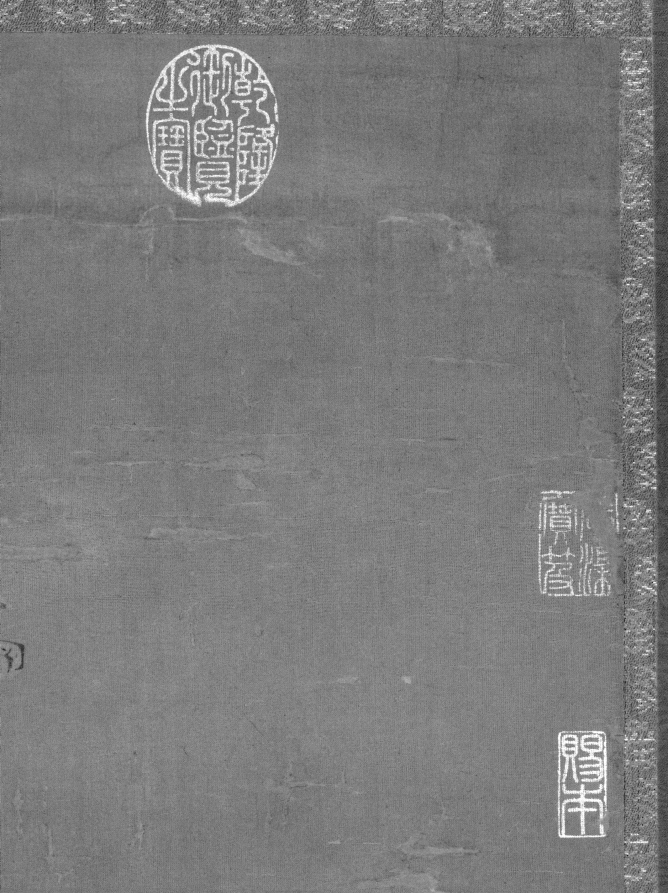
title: A Prunus in the Moonlight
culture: China, Yuan dynasty (1271-1368)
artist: Wang Mian (Chinese, 1287–1359)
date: 1300s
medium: Hanging scroll; ink on silk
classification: Painting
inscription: 8 additional seals: 6 of the Qianlong 乾隆 emperor (r. 1736-95); 2 of Dong Gao 董誥 (1740-1818).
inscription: 海雲初破月團團，獨鶴高飛夜未殘。/ 一片笙簫湖水上，玉妃含笑倚闌干。 王元章作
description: The plum flourishes in the mild climate of the south, and it was not before the Six Dynasties period (220– 589 CE) that the motif began to be appreciated by southern artists, many of whom had emigrated from the north. Wang Mian from Zhejiang province had failed the civil and military service examinations and later rejected appointments under the Mongol government. Instead, he chose to return home, making a living by selling plum paintings. Few of Wang’s works have survived, but they demonstrate that by his time the ink-plum (momei) genre was fully developed.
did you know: The painting portrays the plum in the nighttime, as indicated by the tint of the background and the presence of the moon.